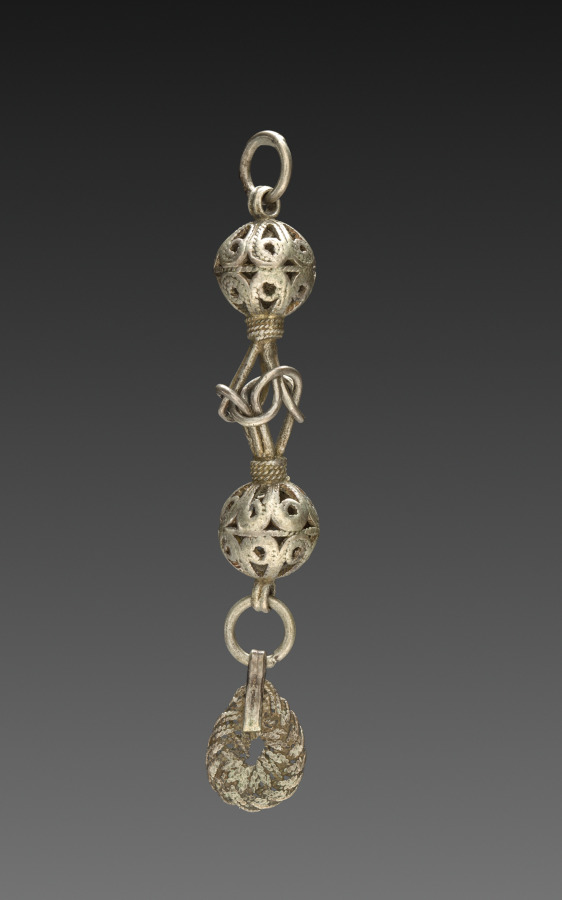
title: Button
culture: Balkans, 19th century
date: 1800s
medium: silver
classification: Jewelry